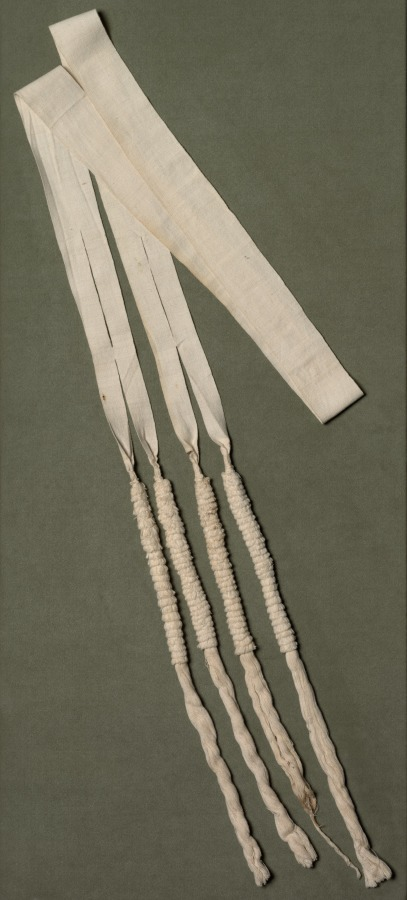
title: Band with Tassels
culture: Peru, North Coast, Chimú style, 1200-1460s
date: 1455–1625 (radiocarbon date, 95% probability)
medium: cotton; weft-faced plain weave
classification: Garment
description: This garment may have been found with others in the collection that formed a matched set worn by a noble of the Chimú, who rose to power on Peru’s north coast after the year 1000.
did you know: The Chimú forged an empire that thrived until the 1460s, when the Inka incorporated it into their own imperial domain.